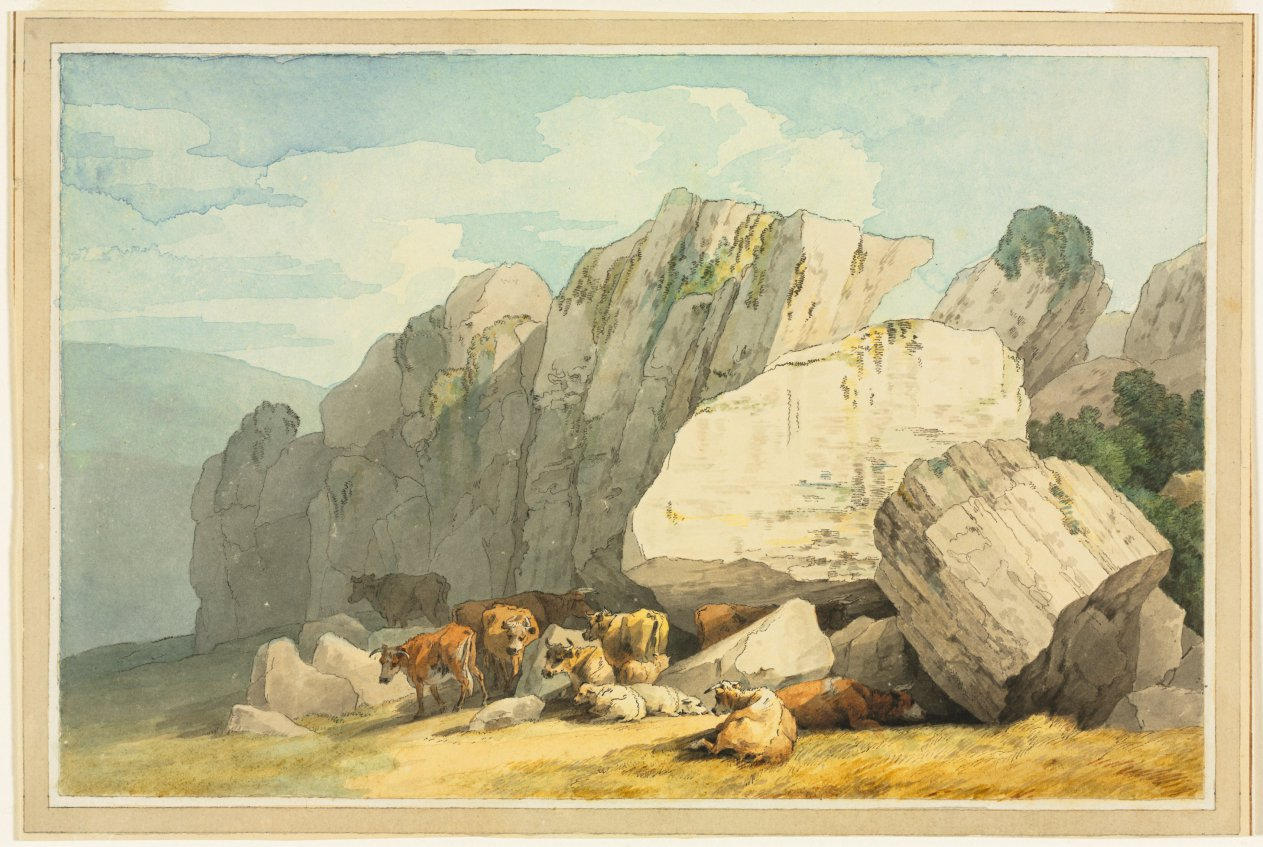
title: Leigh Tor Rocks at Poundsgate, near New Bridge on the Dart, Devon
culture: England, 19th century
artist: John White Abbott (British, 1763–1851)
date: 1800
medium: watercolor with pen and black ink and traces of graphite underdrawing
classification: Drawing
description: This closely observed watercolor was made in Dartmoor—an expanse of moorland in southwest England capped with a series of more than 100 exposed granite hilltops known as "tors," ranging from the monolithic to the nondescript. John White Abbott chose a low vantage point that accentuated the looming immensity of the outcrop in whose shelter a herd of cows has converged. Almost austere in its lack of superfluous detail, this small sheet suggests the untamed quality of the Devon moors.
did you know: In addition to working as a watercolorist, John White Abbott served professionally as an apothecary and surgeon.